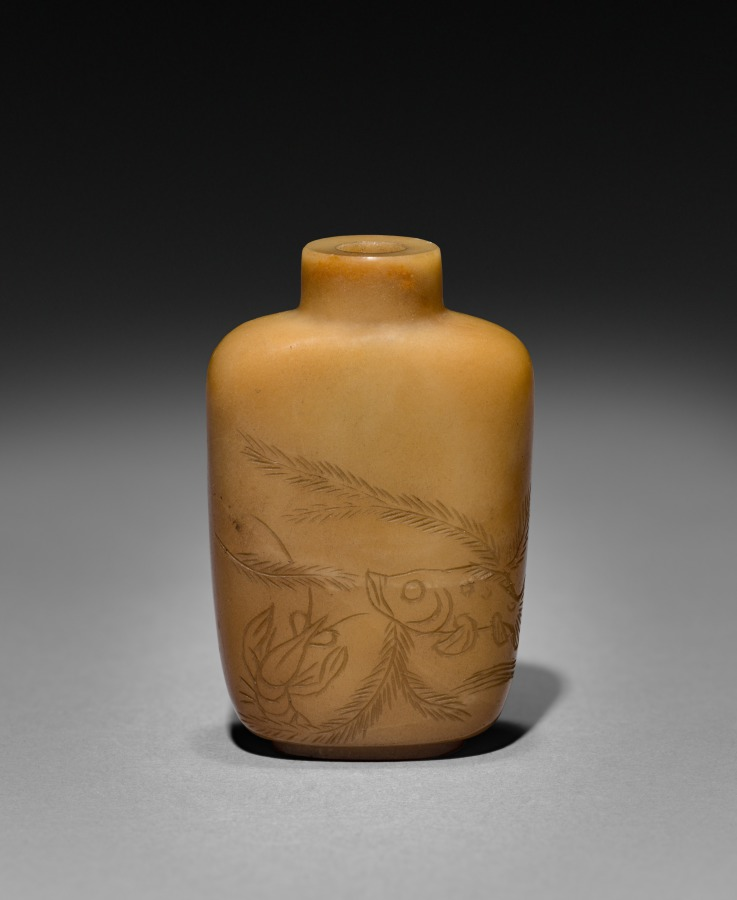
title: Snuff Bottle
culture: China, Qing dynasty (1644-1911)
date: 1800s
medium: glass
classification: Glass